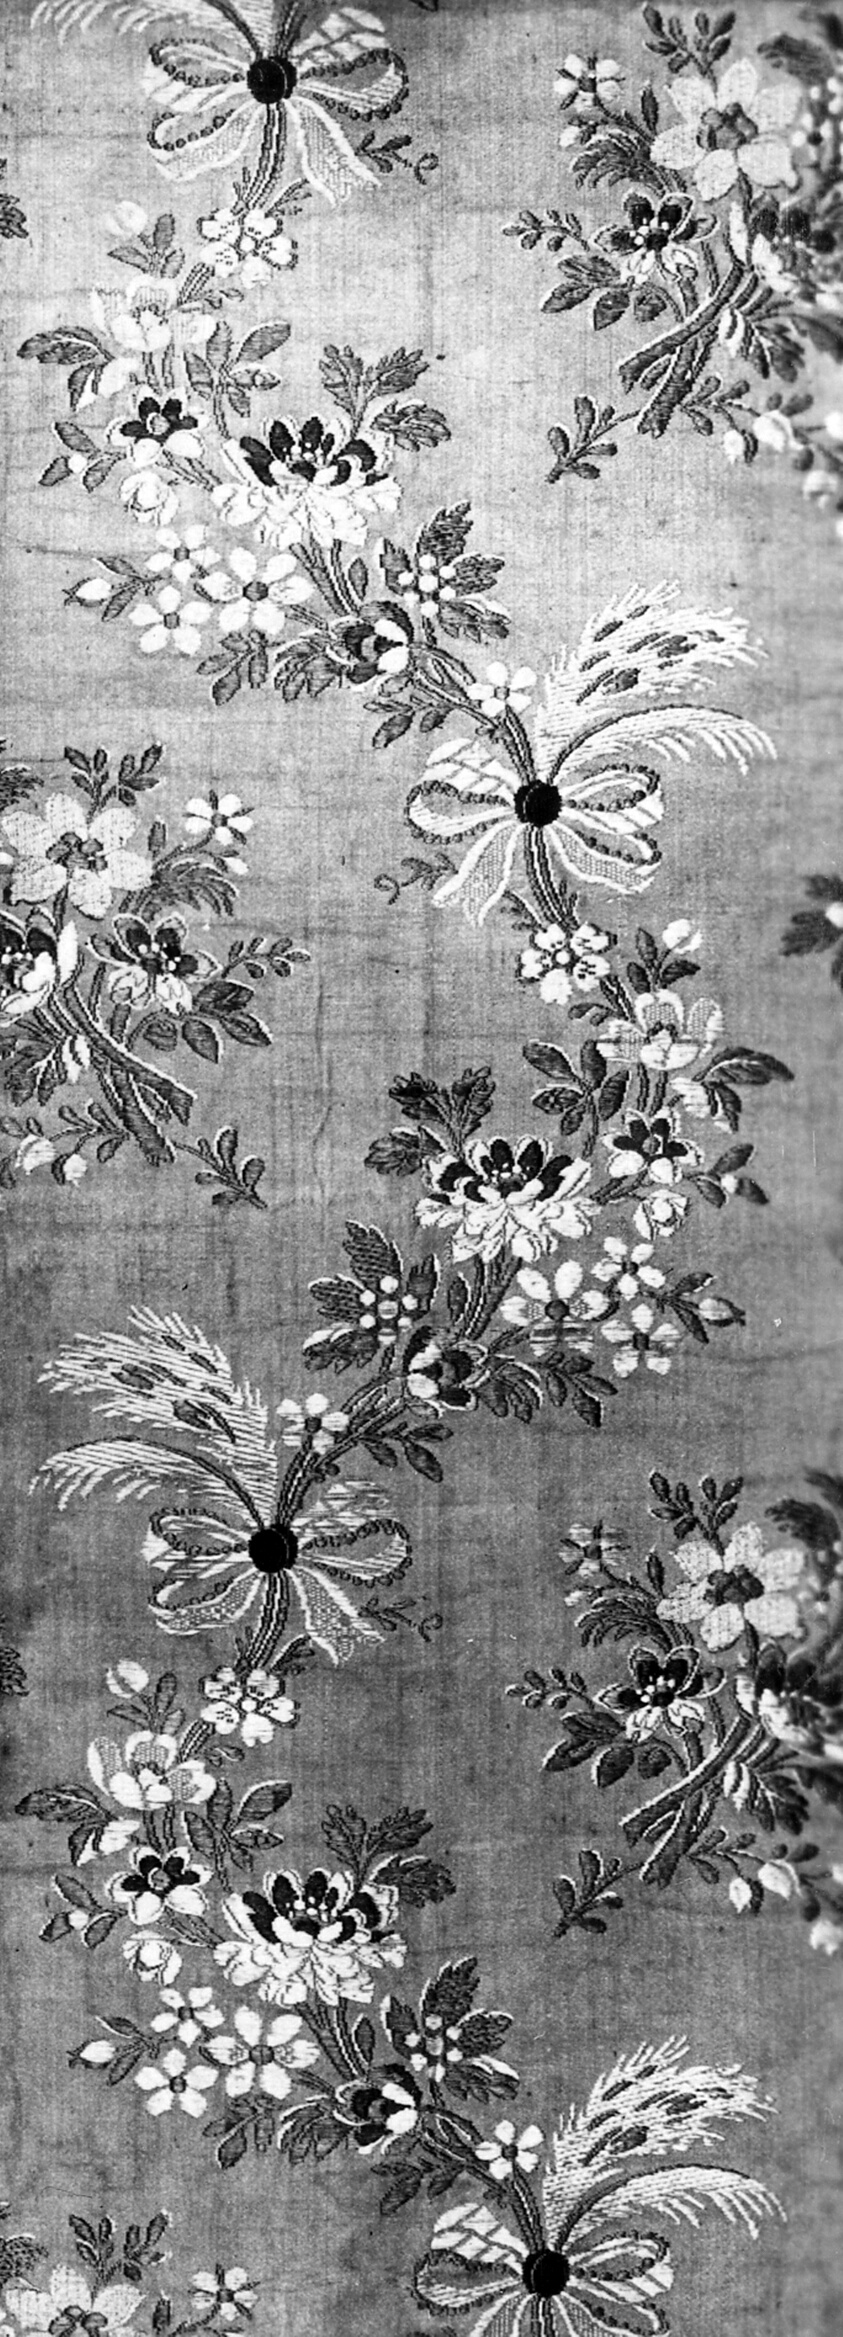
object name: Textile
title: Panel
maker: France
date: End of 18th century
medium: brocaded silk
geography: France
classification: textile; weaving